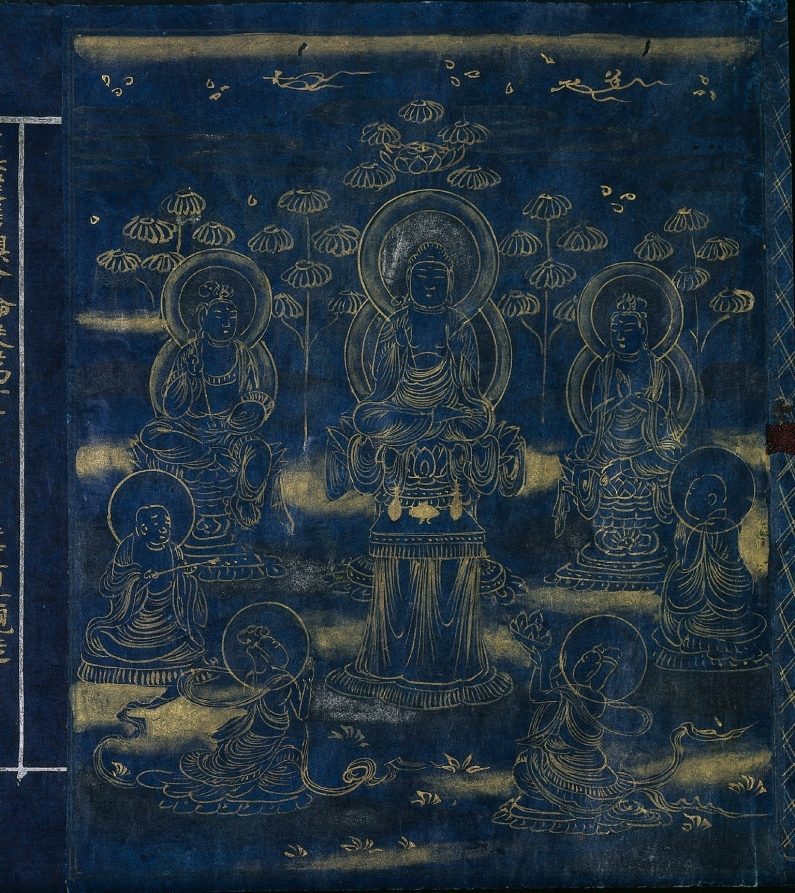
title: Meta-Discourse on the Teachings from the Treasury (Abidharmakosha-Bhashya)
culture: Japan, Heian period (794–1185)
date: 1100s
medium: handscroll; gold and silver on indigo-dyed paper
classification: Manuscript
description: This religious text relates some of the teachings of the great fourth-century Indian Buddhist scholar Vasubhandhu. The text analyzes human consciousness in its relationship to the environment and transformations that occur during meditation. This scroll is the 17th part of a 30-part translation of the text by Xuanzang, an eminent seventh-century Chinese monk.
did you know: The frontispiece depicts the Buddha Shakyamuni preaching in a paradisical landscape.